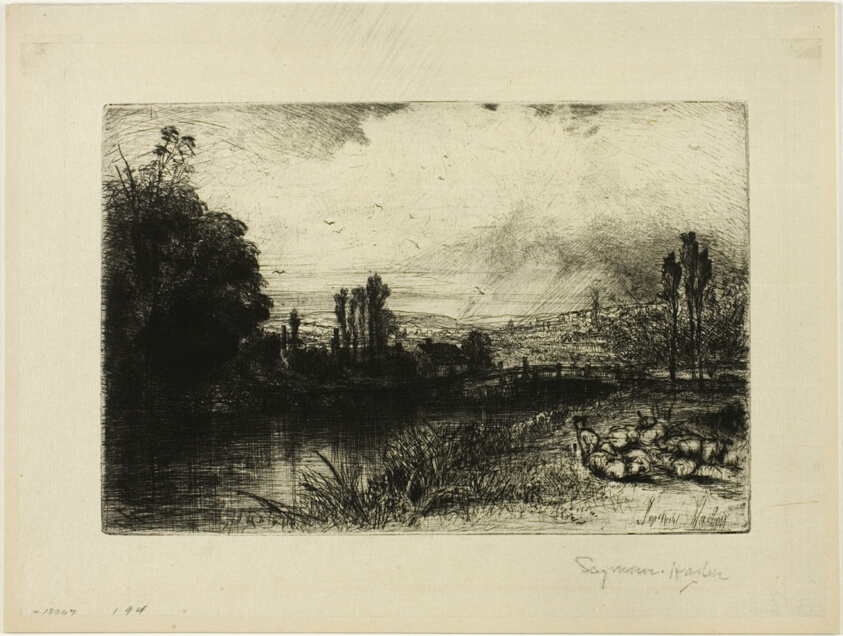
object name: Print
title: On the Test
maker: Francis Seymour Haden (English, 1818-1910)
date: c. 1859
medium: Etching and drypoint on ivory wove paper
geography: England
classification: etching; print; prints and drawing